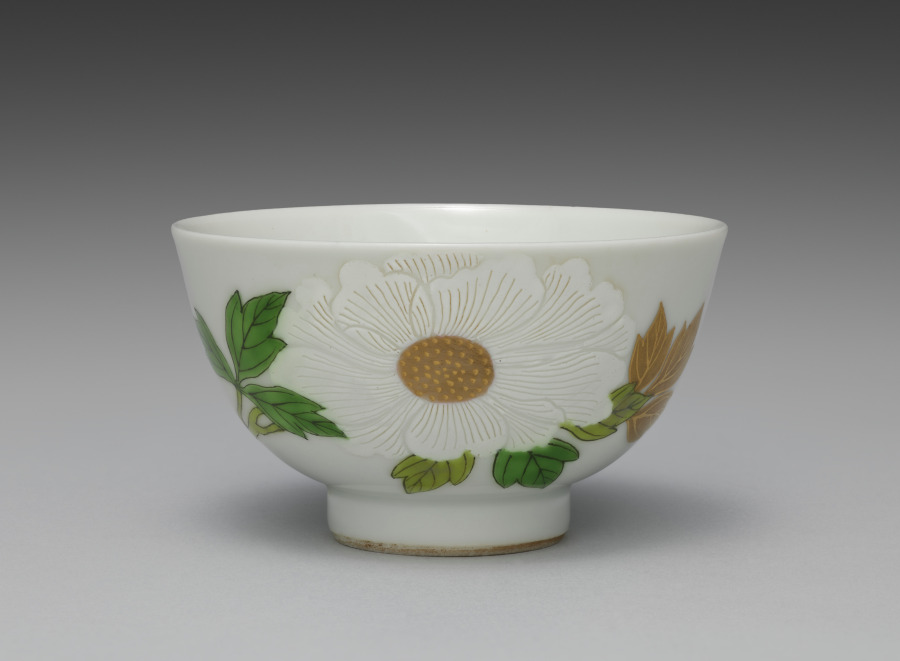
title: Teabowl from Teabowls with Peony and Crabapple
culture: Japan, Meiji period (1868–1912)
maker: Seifū Yohei III (Japanese, 1851–1914)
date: 1893–1914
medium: One from a set of five teabowls; porcelain with underglaze and overglaze color enamels and gold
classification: Ceramic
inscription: 清風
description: Overglaze color enamels are generally called iro-e (literally “color picture”) in the terminology customarily used for porcelain decoration of the Edo period. This set of teabowls is a fine example of Yohei III’s skilled use of the technique, which is identified on this set’s box lid with the alternate phrasing “porcelain with color painting” (jisaiga). Distinct from the way overglaze colors were used in Kakiemon ware from Arita, his designs and applications show a consciousness of porcelain decoration of the Qing dynasty. Here, he combines Chinese models with a sensibility taken from Kyoto ware precedents, including painting with powdered gold (kinrande). The colors used in the bowls are as follows: blue, black, gold, white, light green, green, and pink. The blue appears only inside the footring, as a double band of underglaze color. The black iron, used for stems and leaf veins, is painted over the glaze. The gold, also painted over the glaze, is used for leaves and the centers of flowers, for solid, glossy lines defining detail, or as a semimatte ground. The white of the peony flower is built up to a low relief over the glaze. Yohei has incised lines of varying widths into the pigment, carving away to the bowl’s surface, to differentiate individual petals and their rippled shapes. The light and dark greens, as well as the pink, are painted over the glaze. Of note is how Yohei has first used thinly applied lines of light green to draw the plum branch before applying the opaque iron black. For the plum buds and flowers, he has used a diluted pink with an opaque pink for outline, both over the glaze. In his later works, Yohei used pink both over and under the glaze in a manner similar to underglaze blue, and it can be challenging in some cases to discern which technique he has used. A lidded container in a private collection has a similar design but is augmented with the inclusion of white and purple magnolia blossoms. In contemplating the original decorative program of a set, of which these teabowls may have been a part, it is worth considering that perhaps not all objects included the full range of motifs. In such cases, the composition of the individual object may be best understood within the context of the extended ensemble. Here, the delicate pink plum on one side of the bowl seems slightly unbalanced with the bold white peony on the other, but when seen with other objects with the magnolia and its additional colors and shapes, it is possible to imagine a set with a complex, balanced design across multiple pieces.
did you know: Because four is considered an unlucky number, it became customary to assemble groups of guests of five or multiples of five.